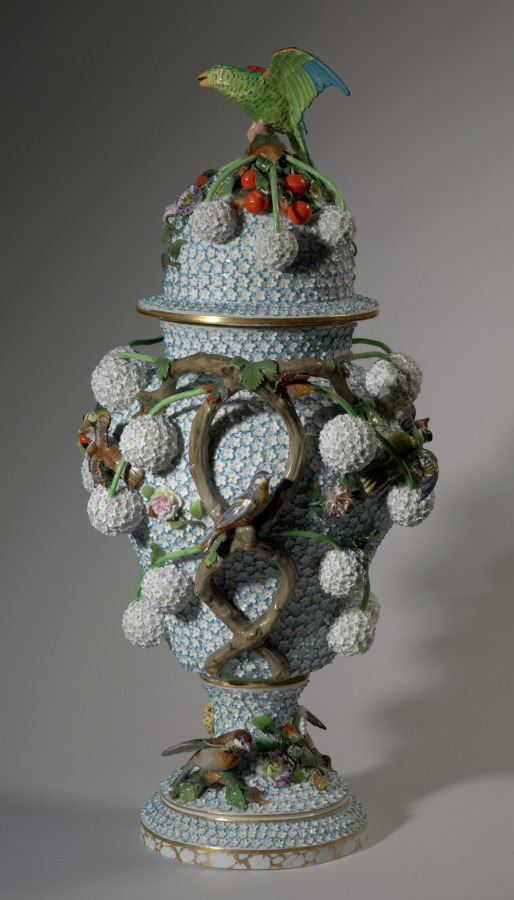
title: Vase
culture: Germany, 19th century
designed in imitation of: Meissen Porcelain Factory (German, est. c. 1710)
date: 1850–1899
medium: porcelain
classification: Ceramic